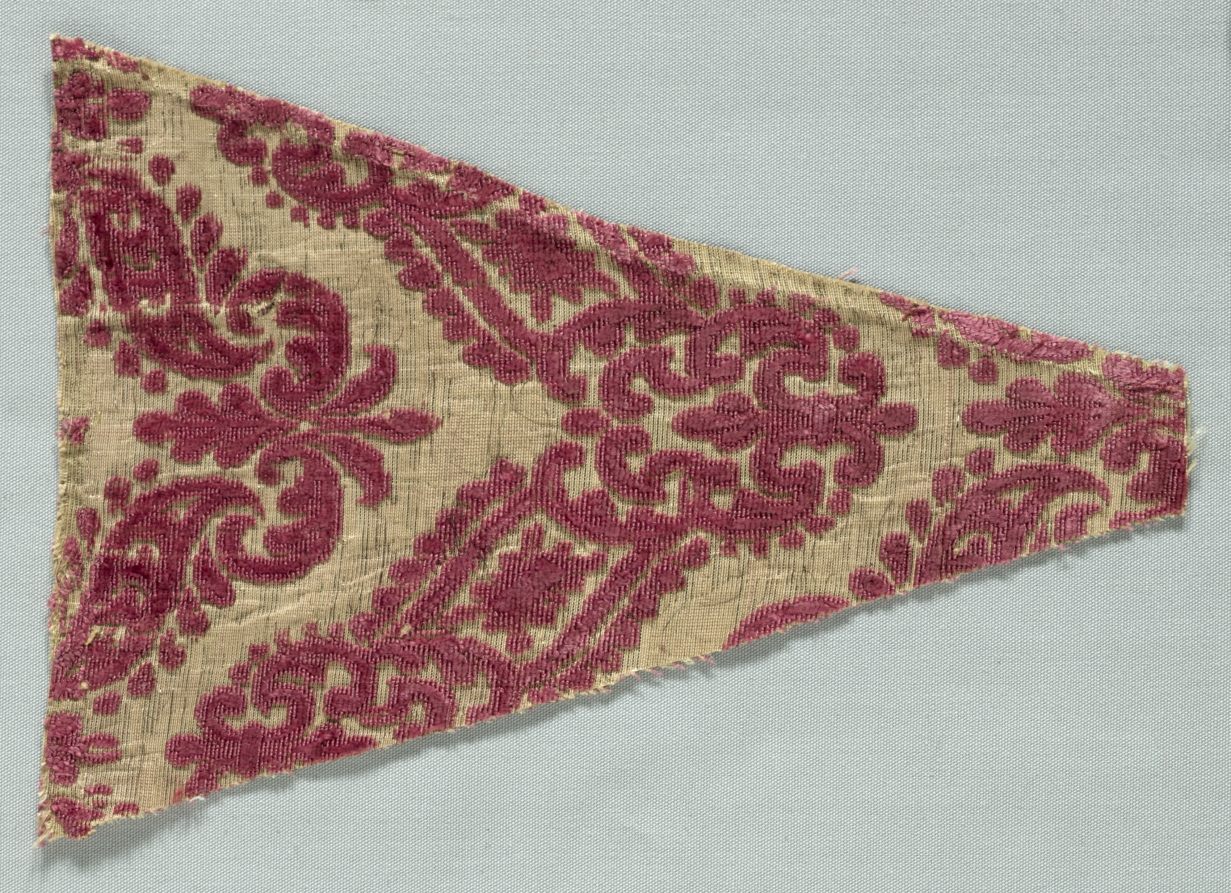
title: Velvet Fragment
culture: Italy, 2nd half 17th century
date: 1650–1699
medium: velvet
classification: Velvet